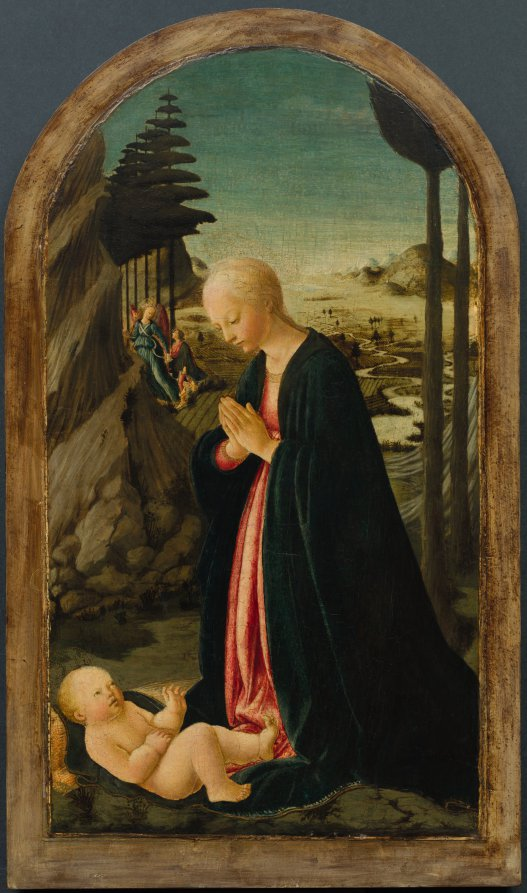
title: Madonna and Child with Tobias and the Angel Raphael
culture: Italy, 15th century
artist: Francesco Botticini (Italian, c. 1446–1497)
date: c. 1470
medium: tempera on poplar panel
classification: Painting